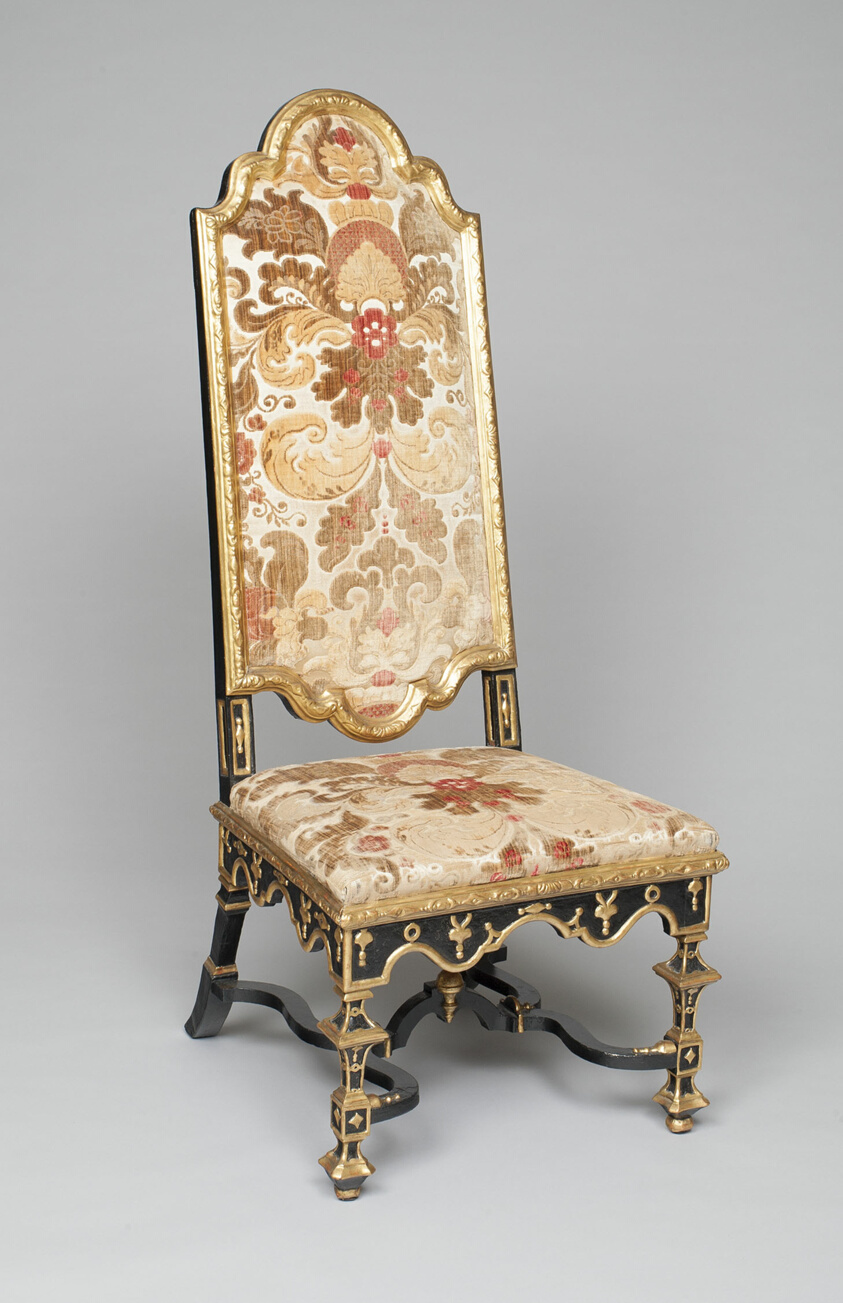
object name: Furniture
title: Side Chair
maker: London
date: c. 1690/1700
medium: Black lacquer and gilded beechwood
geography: London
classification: chair; seating; furniture; european decorative arts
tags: furniture